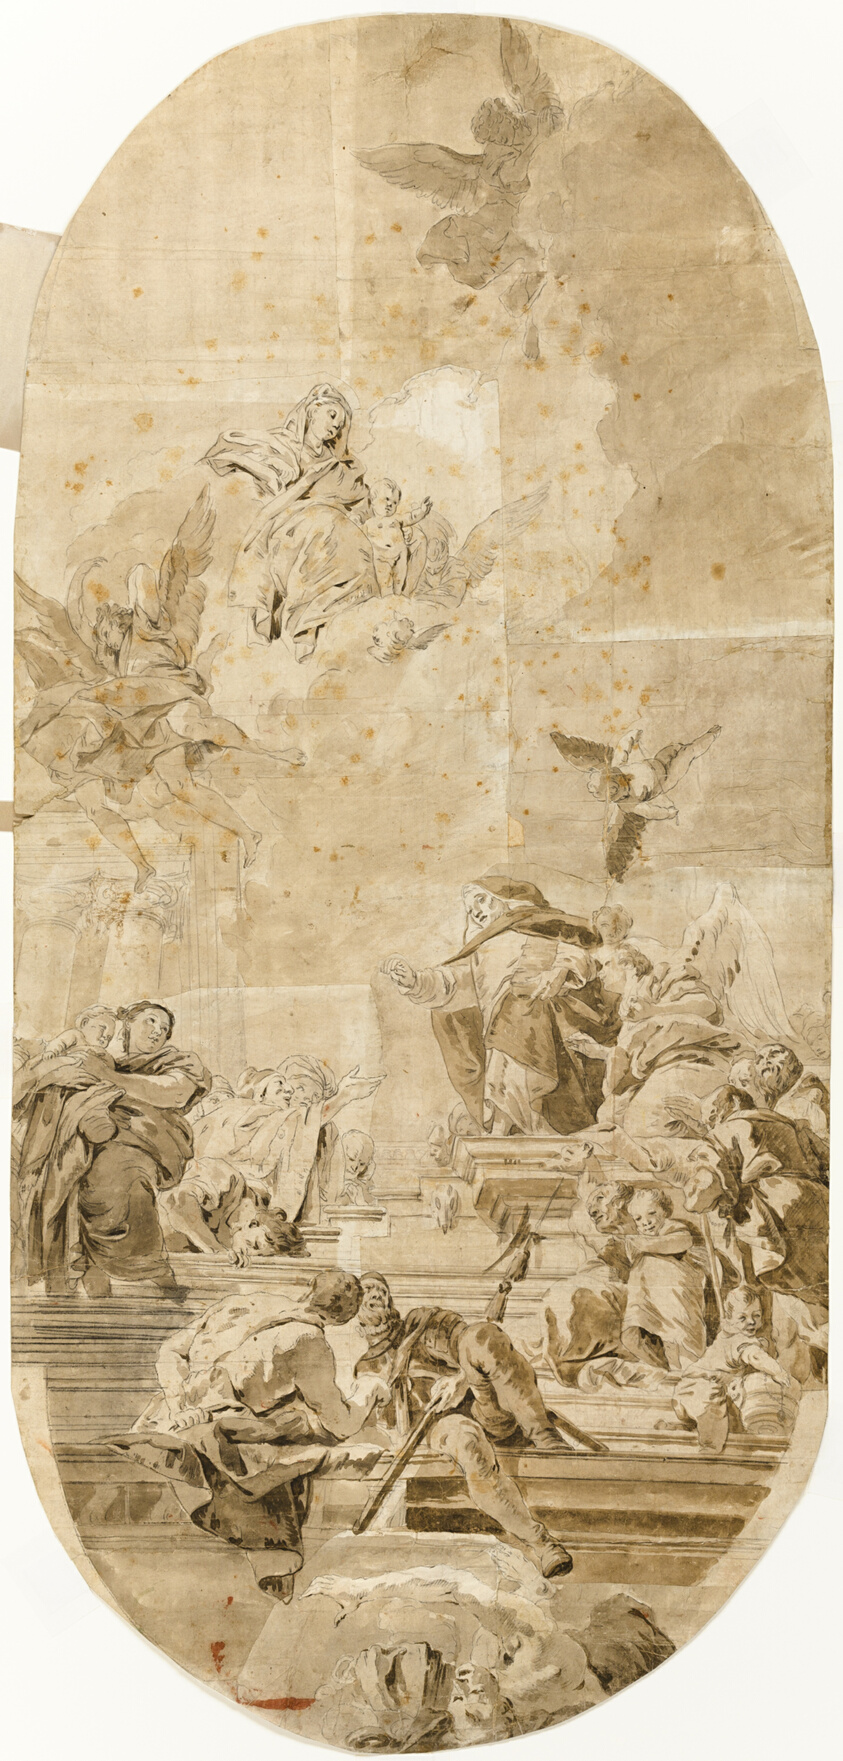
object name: Drawing and Watercolor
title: Study for Institution of the Rosary by Saint Dominic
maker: Francesco Lorenzi (Italian, 1723-1787); after Giambattista Tiepolo (Italian, 1696-1770)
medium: Pen, ink, and wash on paper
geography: Italy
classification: drawings (visual works); prints and drawing